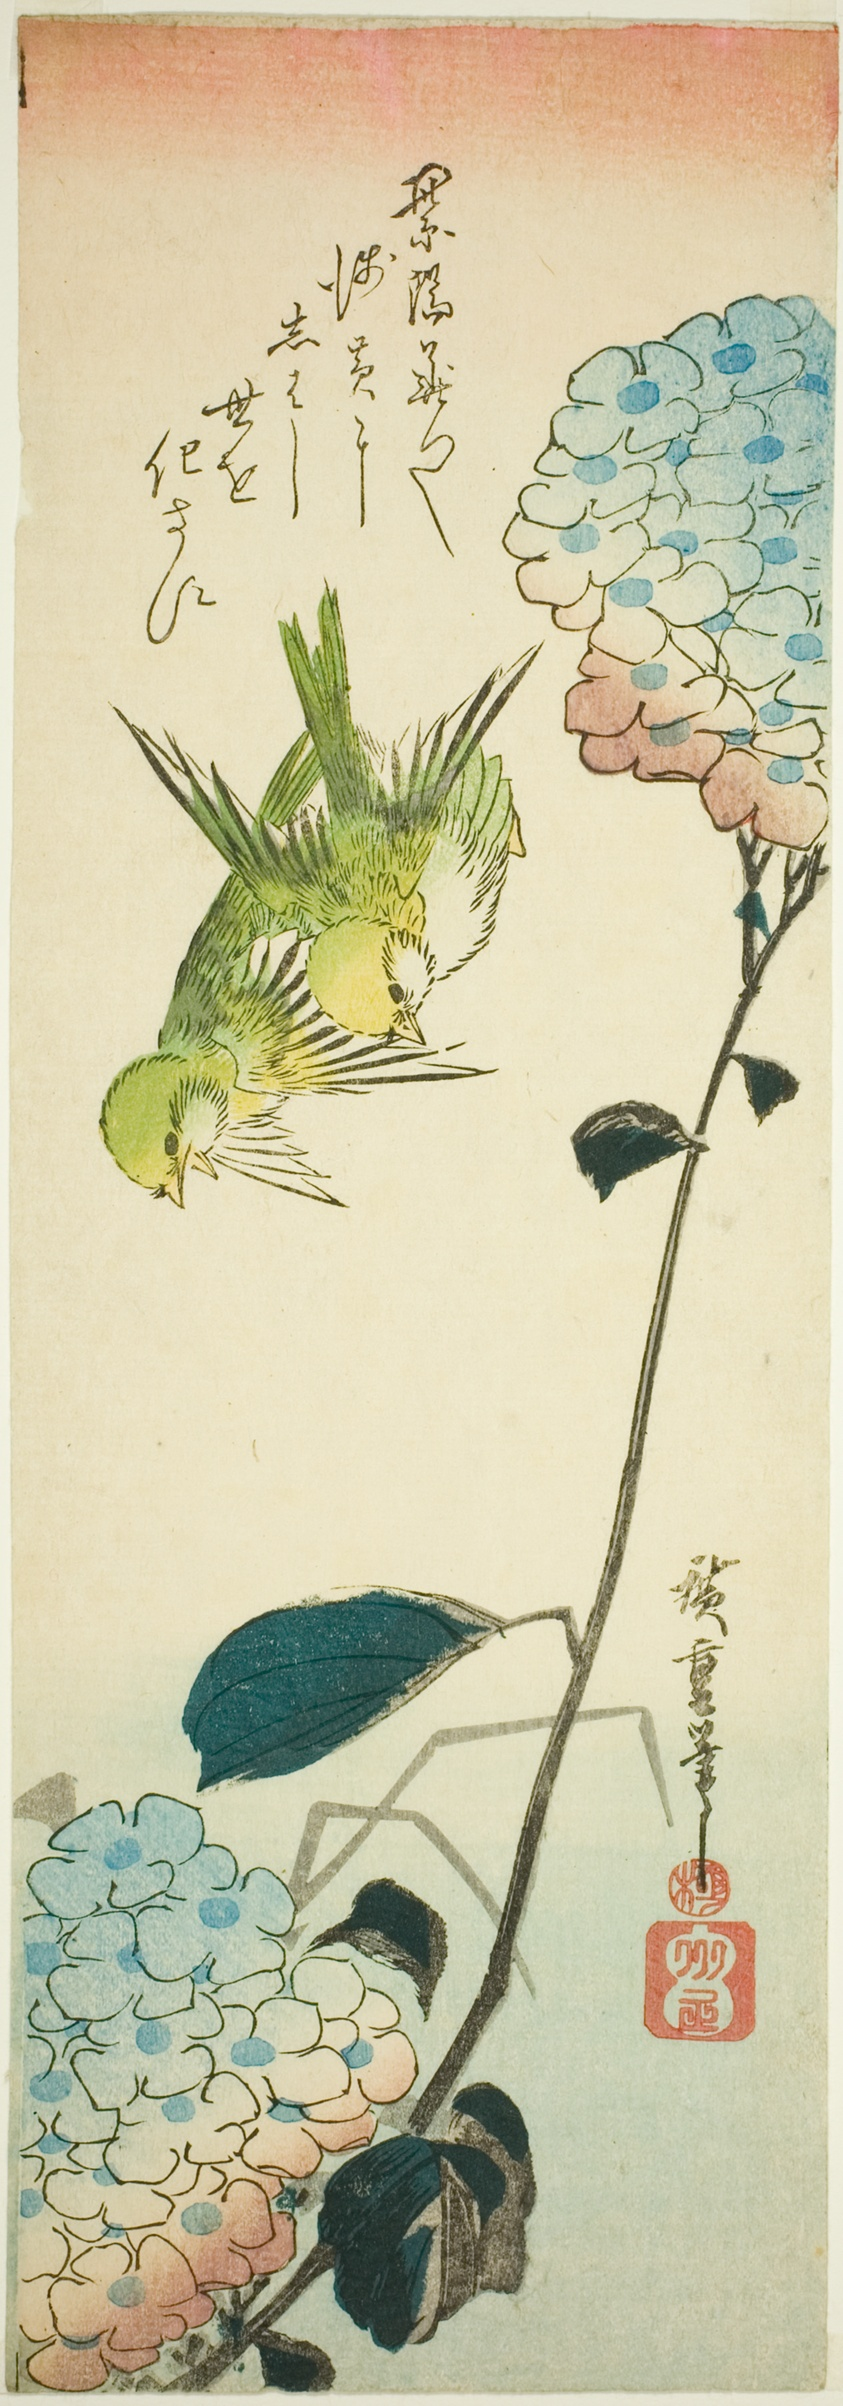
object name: Print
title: Green birds and hydrangeas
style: Japanese (culture or style)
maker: Utagawa Hiroshige 歌川 広重; Japanese, 1797-1858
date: 1830s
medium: Color woodblock print; chutanzaku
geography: Japan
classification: woodblock print; print; asian art